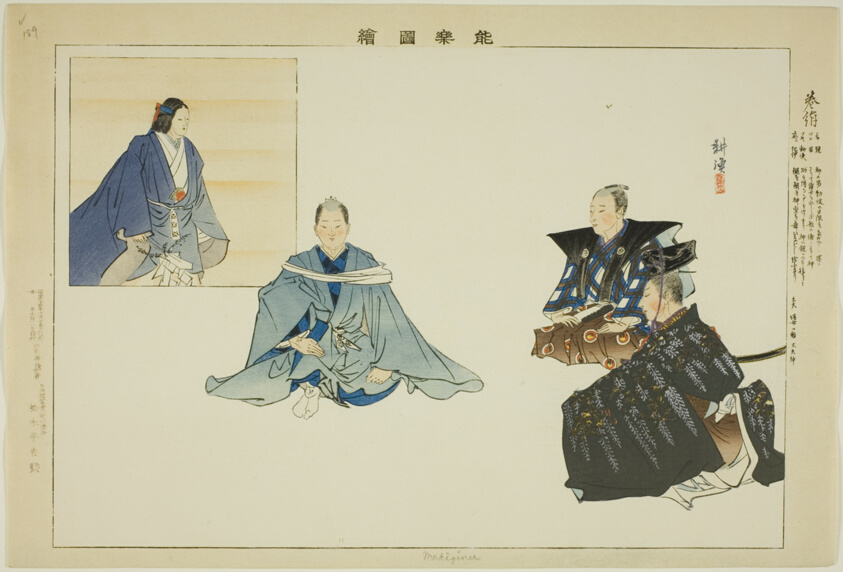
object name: Print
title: Makiginu, from the series "Pictures of No Performances (Nogaku Zue)"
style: Japanese (culture or style)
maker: Tsukioka Kogyo; Japanese, 1869-1927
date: 1898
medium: Color woodblock print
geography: Japan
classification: woodblock print; print; asian art